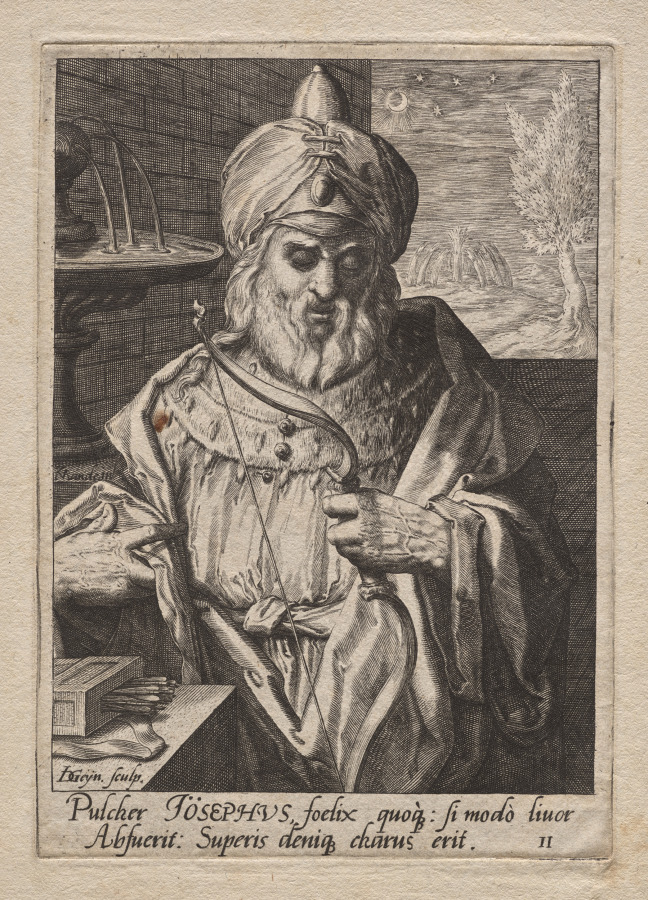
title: Plate 11: Joseph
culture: Netherlands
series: The Twelve Sons of Jacob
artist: Jacob de Gheyn II (Netherlandish, 1565–1629)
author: after Karel I van Mander (Netherlandish, 1548–1606)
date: c. 1589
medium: engraving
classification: Print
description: In this print, the biblical figure Joseph holds a bow next to a quiver of arrows, symbolizing God’s deliverance and protection of Joseph and his people. This is one of a series of prints depicting the twelve sons of Jacob, each with an attribute and costume that denotes his character. According to the Old Testament, Jacob blessed each of his twelve sons, prophesizing the destiny of their tribe, and assigning them a parcel of land in Canaan. The print series was made in the Netherlands in the late 16th century, a time of political struggle when Old Testament heroes were popular exemplars of fortitude and patience.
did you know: The abundantly flowing fountain in this image may refer to Jacob’s blessing to his son Joseph that he would enjoy a double portion of inheritance.